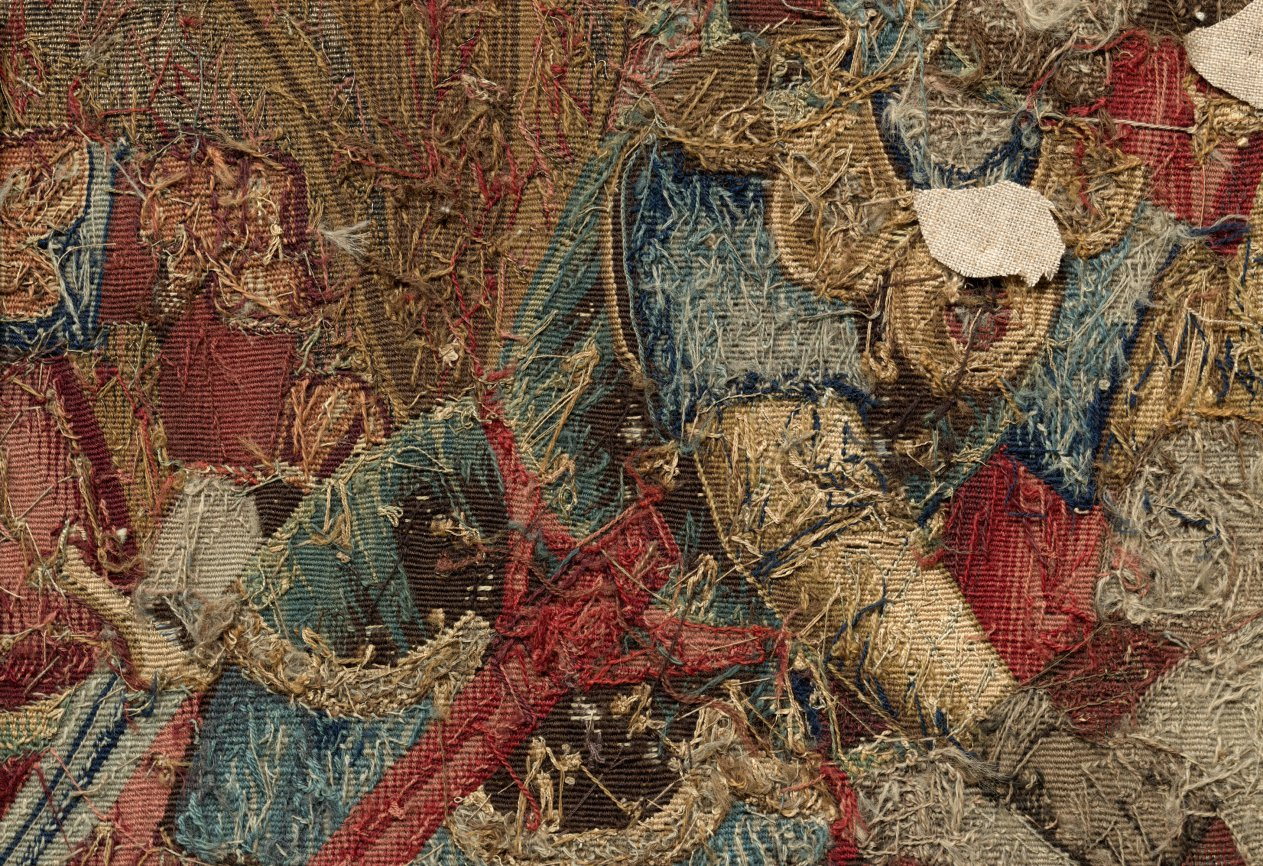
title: Altar Frontal: Scenes from the Childhood of Christ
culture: France and South Netherlands, 1500s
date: c. 1500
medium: Wool, silk, gold thread; tapestry weave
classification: Tapestry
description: Pictorial tapestries were symbols of wealth and more highly prized than paintings. Small tapestries with Christian imagery were frequently commissioned to embellish the fronts of altars. This example displays the Massacre of the Innocents, the Flight into Egypt, and Christ among the Doctors. Tapestry weave is ideal for creating narrative scenes. The technique can be compared to painting, as each colored weft (horizontal thread) is interlaced with warps (vertical thread) where needed for the pattern. As expensive investments, tapestries have the advantage of being portable and easily stored and displayed.